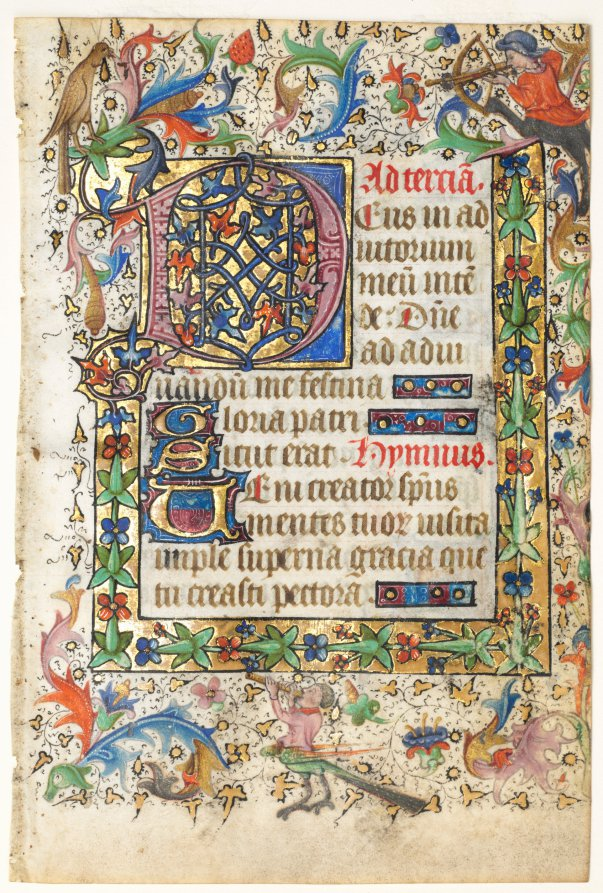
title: Leaf from a Book of Hours: Decorated Initial D[eus] with Foliated Border (Opening of Terce: Hours of the Holy Spirit)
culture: Flanders, Ghent?, 15th century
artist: Master of Guillebert de Mets (Flemish)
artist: and Workshop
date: 1430s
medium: ink, tempera and gold on vellum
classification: Manuscript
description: The Master of Guillebert de Mets (probably Jean de Pestivien) is named after the scribe who recorded his name in an illuminated copy of the Decameron (a collection of stories by Giovanni Boccaccio, written 1351–53) made for Duke Philip the Good of Burgundy, and for which the artist contributed several miniatures. The Master of Guillebert de Mets was active from about 1410 to 1445. So far there is no proof that allows us to follow his career or to know precisely where he worked. Some evidence, however, hints that he was of Flemish origin. The artist painted in an easily recognizable style. His figures have prominent heads with clearly delineated eyes and small mouths, slender torsos with thin, spindly legs, and long, finely worked fingers. Many of his miniatures, such as the Crucifixion and Last Judgment here, show that he often favored mosaic backgrounds of delicately worked checkered patterns.